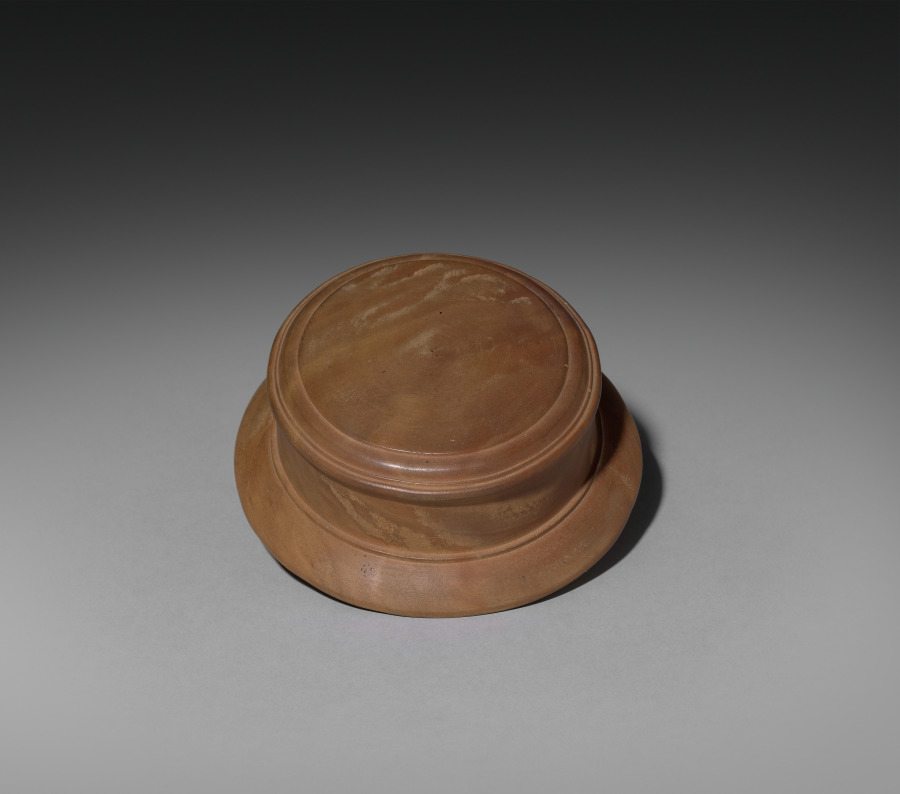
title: Covered Jar (lid)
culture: Vietnam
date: 1500s–1600s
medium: stoneware with blue and white decoration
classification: Ceramic